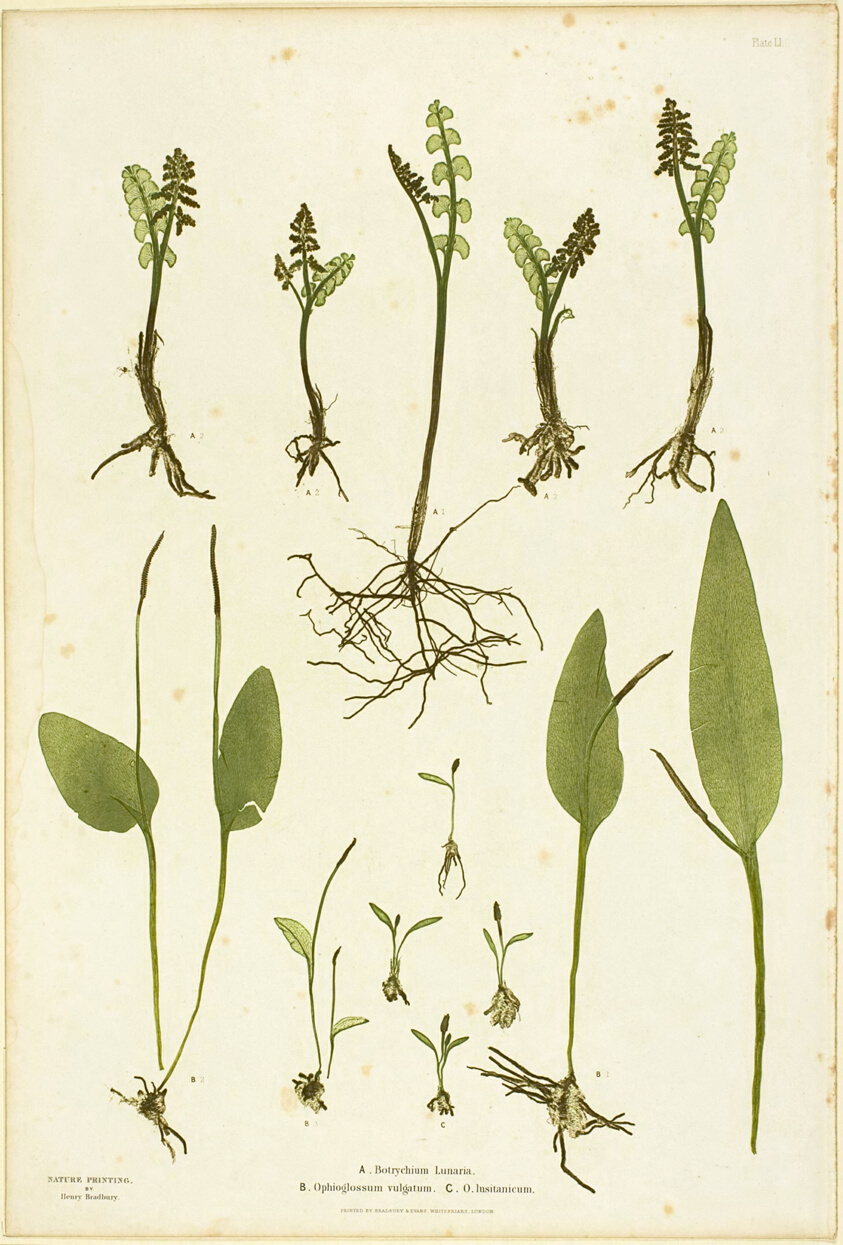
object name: Print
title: Nature Print of Moonwort and Adder's Tongue Ferns, plate 51 from The Ferns of Great Britain and Ireland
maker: Henry Bradbury (English, 1829-1860)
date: 1855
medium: Color soft ground etching, from botanical specimens, inked à la poupée, on off-white wove paper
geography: England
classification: monotype; print; prints and drawing